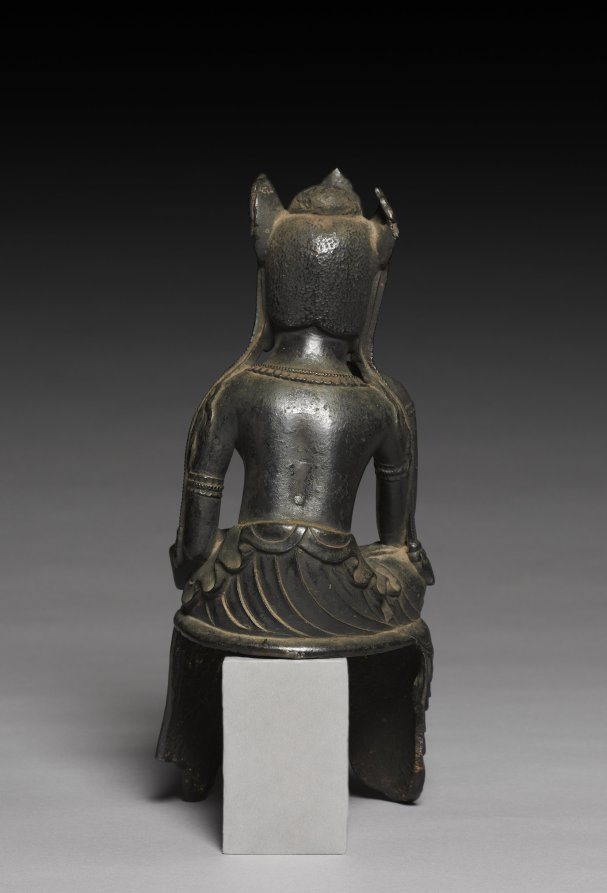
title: Buddha of the Future (Miroku Bosatsu)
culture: Japan, Asuka period (538–710)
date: late 600s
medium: cast bronze, incised, with traces of gilding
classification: Sculpture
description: Buddhism was introduced to Japan in the sixth century. For early Japanese devotees, Buddhism offered the promise of salvation through faith in the Buddha of the Future, who would appear at the end of the world. The concept of eternal salvation held particular resonance with the Japanese aristocracy, who became the staunchest supporters of this new faith. Small sculptures like this one, with its gentle grace and powerful presence, were popular devotional objects.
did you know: The Sanskrit name of this being, Maitreya, derives from the Sanskrit word for friend, mita.